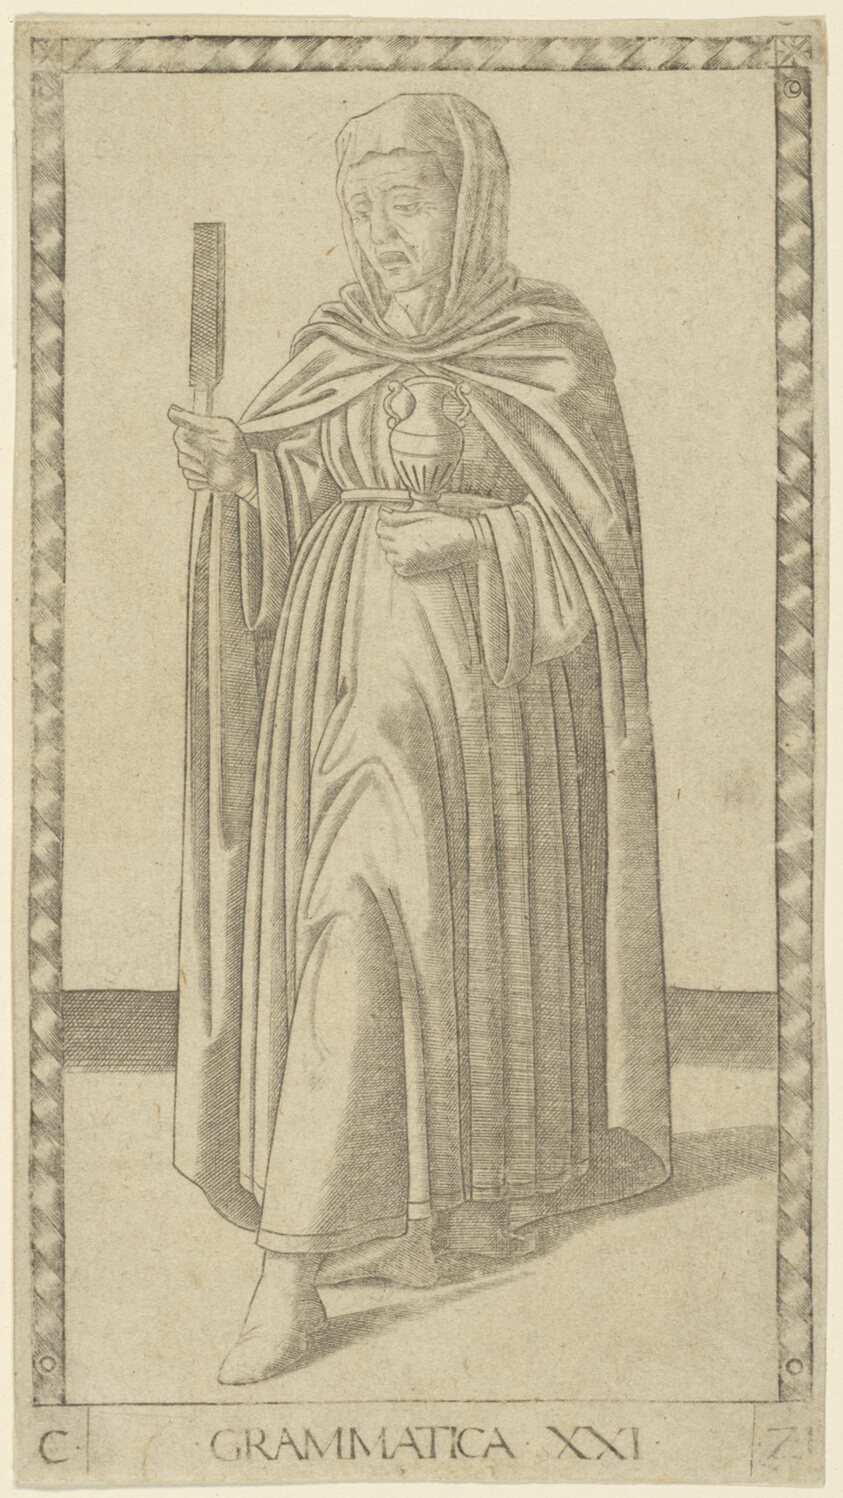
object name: Print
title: Grammar, plate 21 from Arts and Sciences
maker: Master of the E-Series Tarocchi (Italian, active c. 1465)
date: c. 1465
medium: Engraving in black on cream laid paper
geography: Italy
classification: engraving; print; prints and drawing